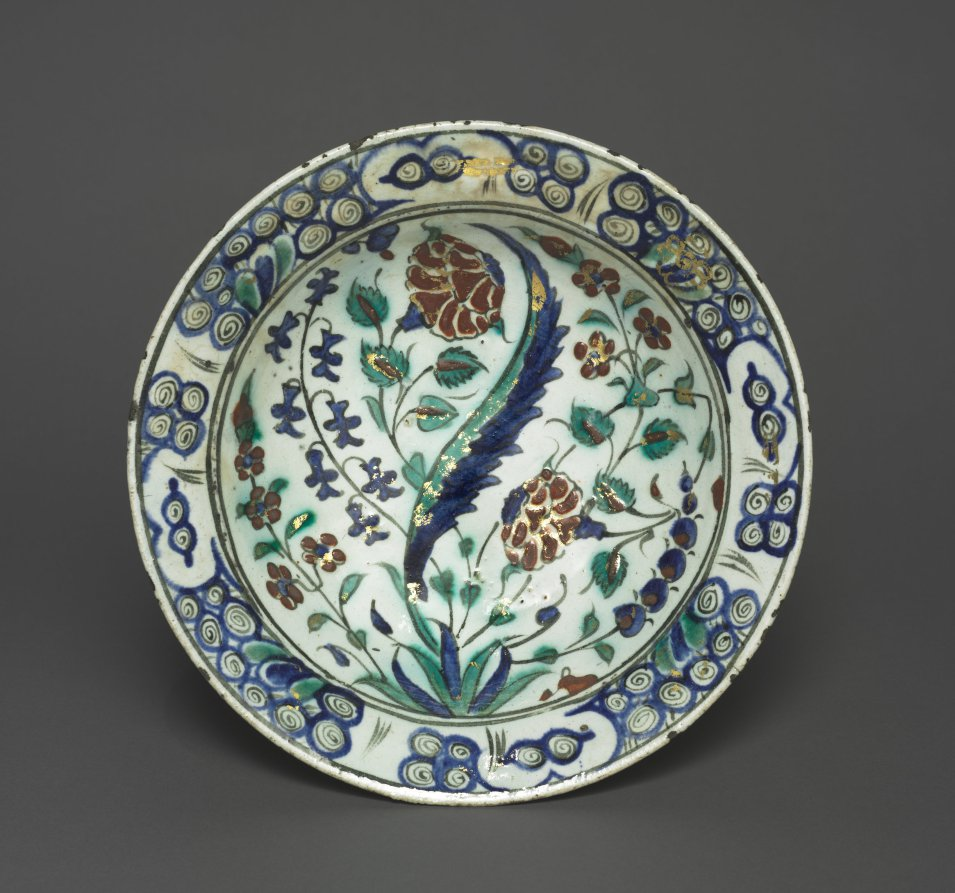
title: Gilded Dish with Flowers and Leaves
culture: Turkey, Iznik, Ottoman period (1299–1922)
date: c. 1590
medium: Fritware with red slip, underglaze design, and overglaze gilding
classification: Ceramic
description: This floral design highlights the rich red, the most difficult to achieve in ceramics, that was developed by Turkish potters. The design is divided with a central swaying saz leaf, with red roses, blue hyacinths, and other floral elements enhanced with glittering gold, a feature that rarely survives. The rim displays a simplified “rock and wave” design adopted from Chinese ceramics which were abundant in the imperial Topkapi Palace in Istanbul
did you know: Turkish potters developed the red color with a clay slip rich in iron.